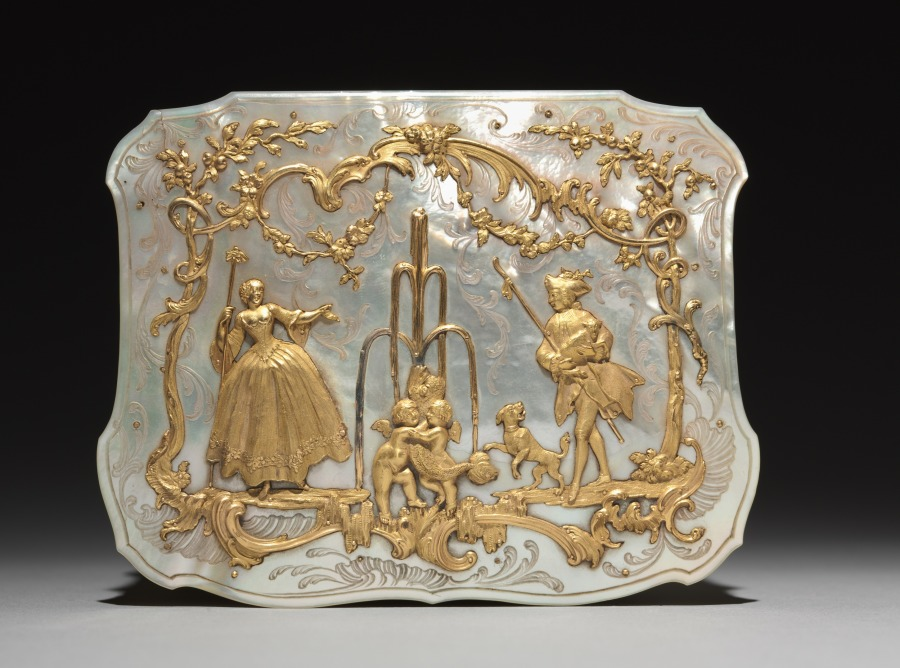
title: Sewing Box with Implements (Nécessaire)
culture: Austria, possibly Vienna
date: c. 1765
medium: gold and mother-of-pearl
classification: Miscellaneous